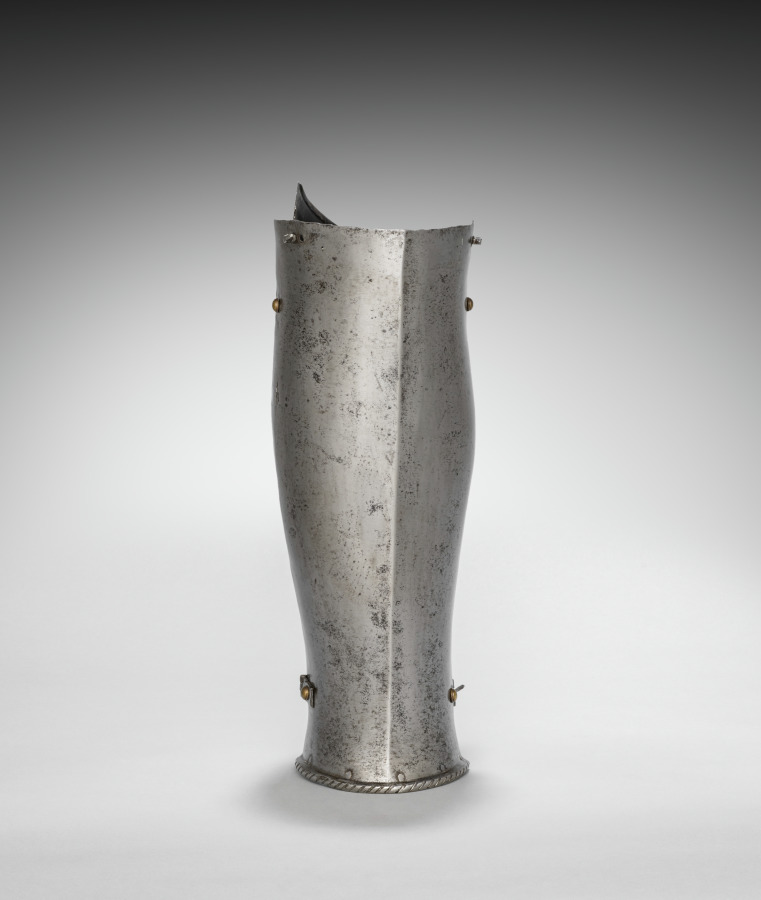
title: Proper Right Greave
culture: South Germany, 16th century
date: c. 1560–1580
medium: steel, leather straps, brass rivets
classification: Arms and Armor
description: This armor was developed for the joust-a sporting combat between two mounted contestants. Although all of the elements of this armor date from the same period, they are not all from the same suit. This armor is thus called "composed." It also shows the asymmetry of jousting armor. The participants rode along a wall-like barrier known as a "tilt" with their left sides facing one another. Consequently, armor on that side of the body had to be thicker. Note the large plate (grandguard) over the left shoulder for extra protection. Also, the breathing holes in the helmet were placed on the right side (farthest from an opponent's lance) to avoid injuries from splinters. The bracket attached to the right breastplate is called the lance-rest, a shock-absorbing support designed to accommodate the lance when "couched" under the right armpit.